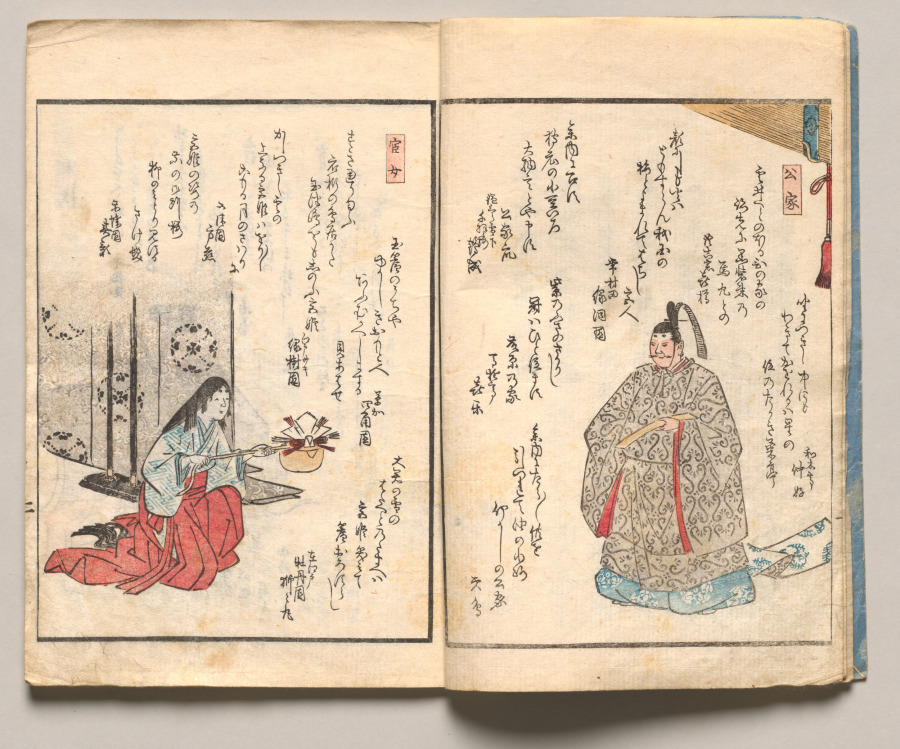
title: Spread Three from Volume One of People of Japan in Light Verse (Kyōka)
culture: Japan, Edo period (1615–1868)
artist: Utagawa Hiroshige (Japanese, 1797–1858)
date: 1857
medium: Woodblock-printed book; ink and color on paper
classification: Bound Volume